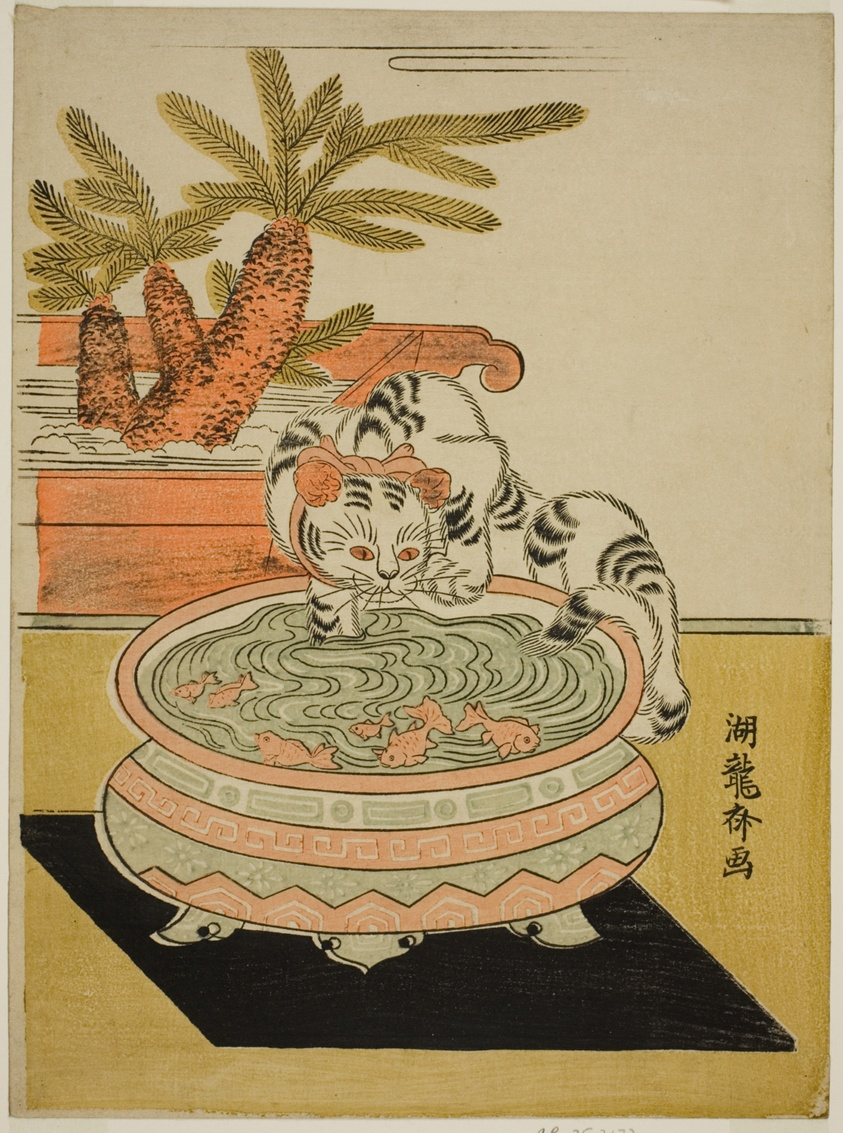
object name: Print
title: Cat Pawing at Goldfish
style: Japanese (culture or style)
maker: Isoda Koryusai (Japanese, 1735-1790)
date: c. early 1770s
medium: Color woodblock print; chuban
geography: Japan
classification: woodblock print; print; asian art